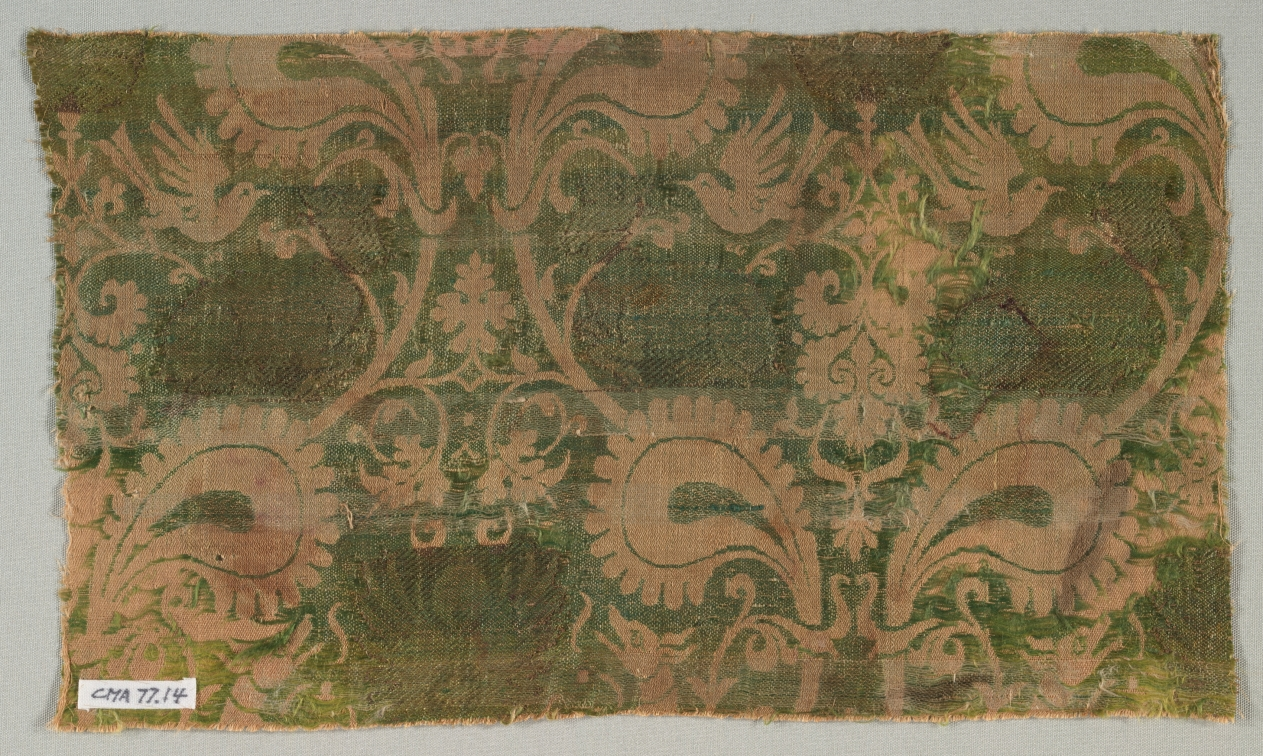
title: Silk with Dogs and Birds amid Vines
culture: Italy, second half of 14th century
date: 1350–1400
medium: silk, gold thread; a combination of two weaves, 2/1 twill and plain weave (lampas)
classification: Textile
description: Silks from China and the Islamic Near East introduced radically new designs with asymmetry and exotic animals around 1300, which Italian silk designers incorporated in an international style to compete with imports from the East. These large palmette leaves were adapted from Islamic silks whereas the recumbent deer, birds, and dogs (visible at the bottom) were popular Italian motifs. Textiles were lucrative commercial commodities during the Middle Ages. Intrepid Italian merchants traveled by land and sea to China, Mongolia, India, and the Islamic Near East, led by the maritime republics of Venice and Genoa. The renowned Venetian, Marco Polo, published his overland journey across Asia to China in 1265.